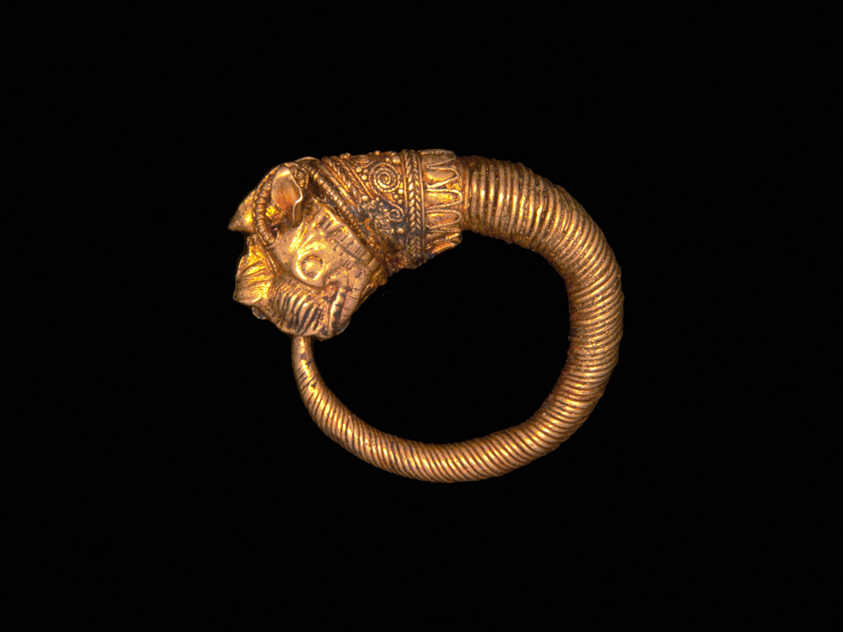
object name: Costume and Accessories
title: Earring with Lion Head Finial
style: greco-roman (egyptian), ancient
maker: Greek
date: 3rd-2nd century BCE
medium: Gold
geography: Ancient Greece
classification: ear ornament; gold; metal; jewelry; ancient art; costume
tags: beauty, rituals